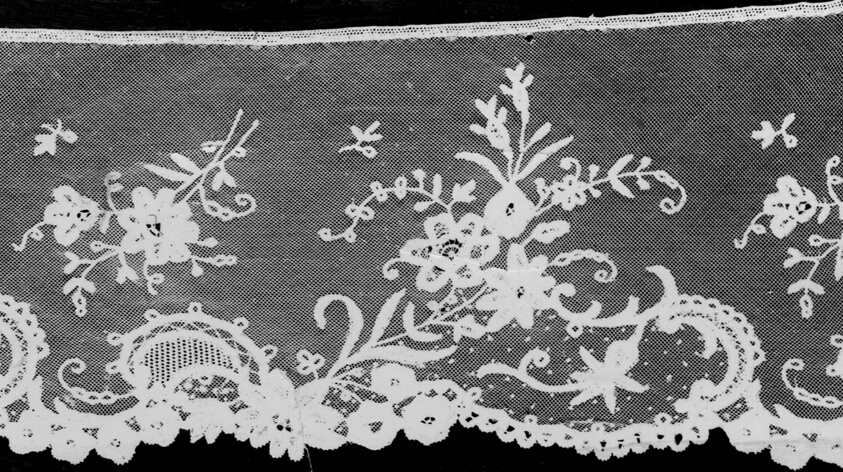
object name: Textile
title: Flounce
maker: Belgium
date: 1875/1900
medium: Cotton, mixed lace known as "Brussels application lace:" bobbin and needle laces applied to machine-made net; embroidered in knot and zig-zag chain stitches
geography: Belgium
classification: textile; lace - mixed